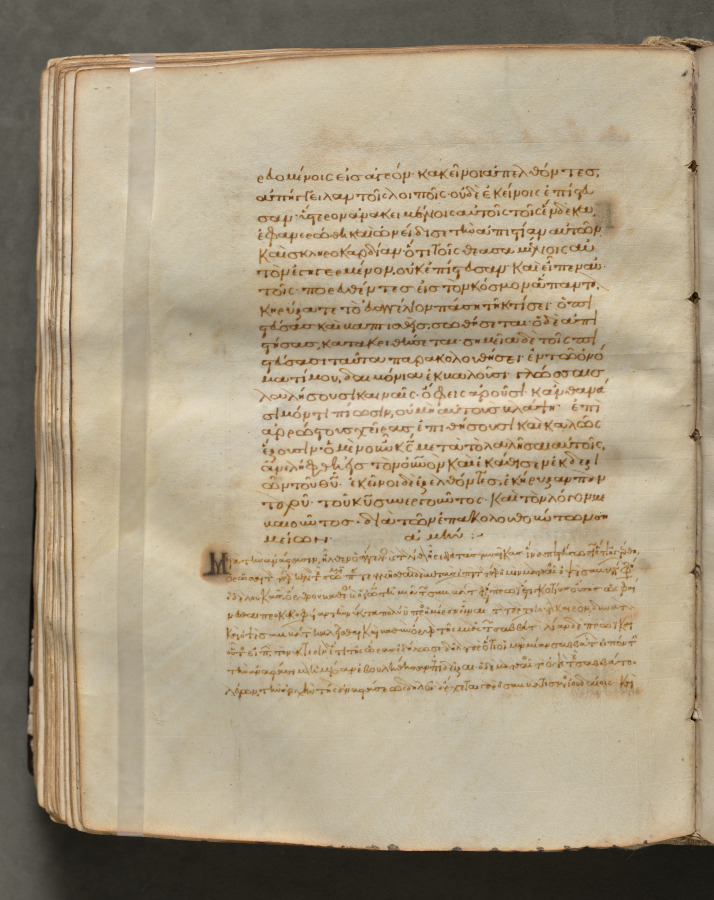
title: Text, folio 196 (verso), from a Gospel Book with Commentaries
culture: Byzantium, Constantinople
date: c. 1000–1100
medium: ink, tempera, and gold on vellum; leather binding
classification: Bound Volume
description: Each of the four gospels in this book opens on a page with brilliantly illuminated borders depicting the author of the text as well as birds-principally peacocks, symbols of the immortality of the soul-and fountains, representing the fountain of life and the salvation of the soul. This volume consists of 428 leaves with texts in Greek. Its level of sophistication suggests that it was probably written and decorated in a monastery in Constantinople.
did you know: Gospel Books were carried in procession through Byzantine churches.